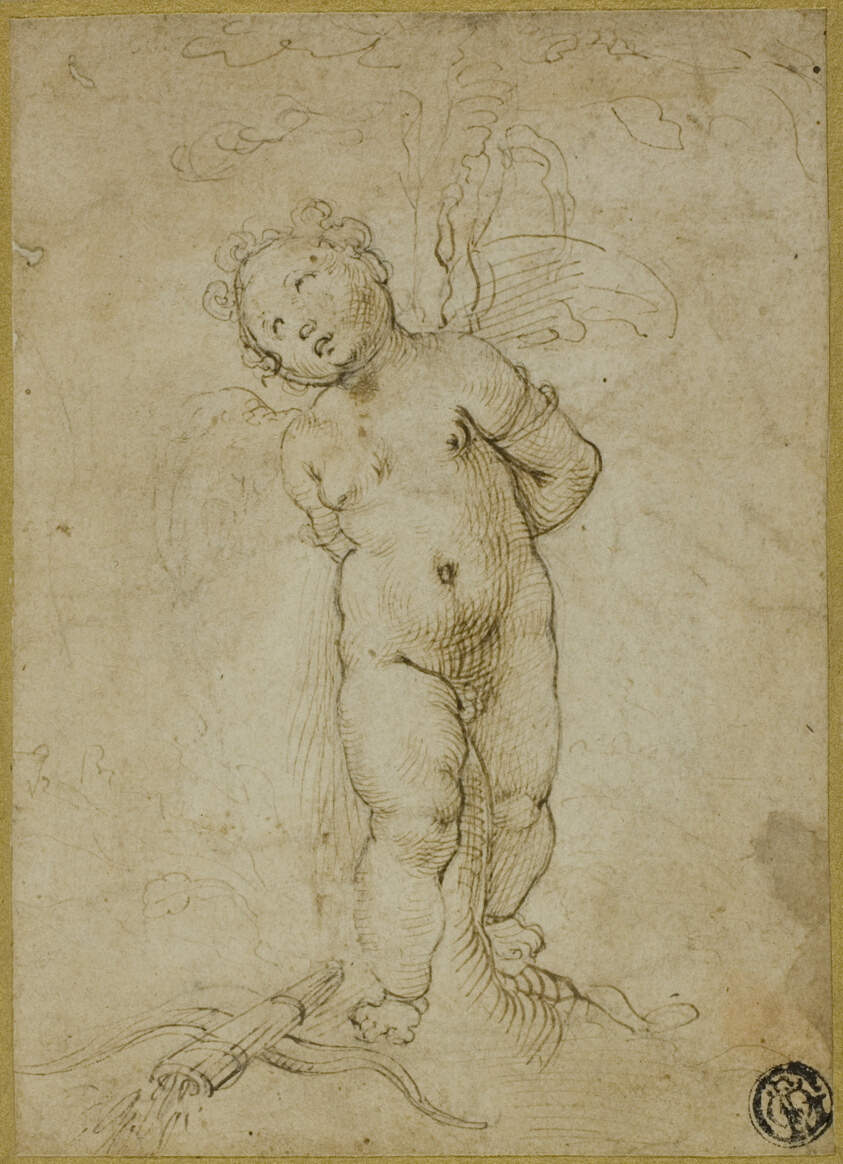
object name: Drawing and Watercolor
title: Cupid Tied to a Tree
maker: Attributed to Giorgio Picchi; Italian, c. 1560-1605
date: 1570/99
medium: Pen and brown ink over traces of black chalk, on tan laid paper, laid down on ivory laid card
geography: Italy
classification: pen and ink drawings; drawings (visual works); prints and drawing